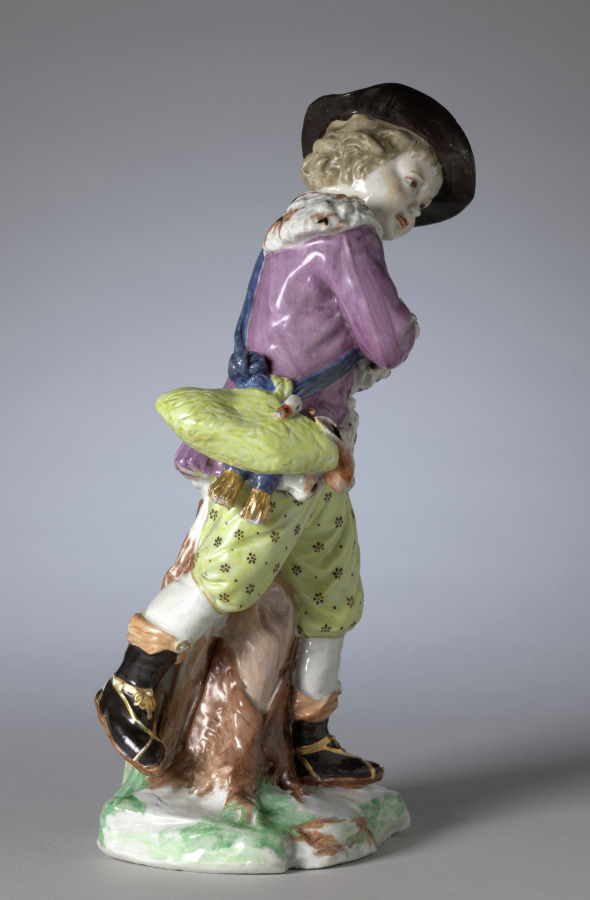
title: Figure of Winter from the Four Seasons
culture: England, Bristol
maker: Bristol Porcelain Factory (British, 1770–81)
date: c. 1775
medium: hard-paste porcelain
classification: Ceramic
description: The modern notion of childhood as a time of innocence and simplicity emerged during the second half of the eighteenth century. This understanding of adolescence led to numerous depictions of children as personifications of the four seasons. Here winter is portrayed as a young boy wearing ice skates, a fur-lined jacket, and a hat adorned with holly branches. In his satchel he carries a goose and rabbit, both of which are commonly hunted in the winter.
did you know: Allegorical figures most often decorated a table during the dessert course, providing amusing subjects for conversation.